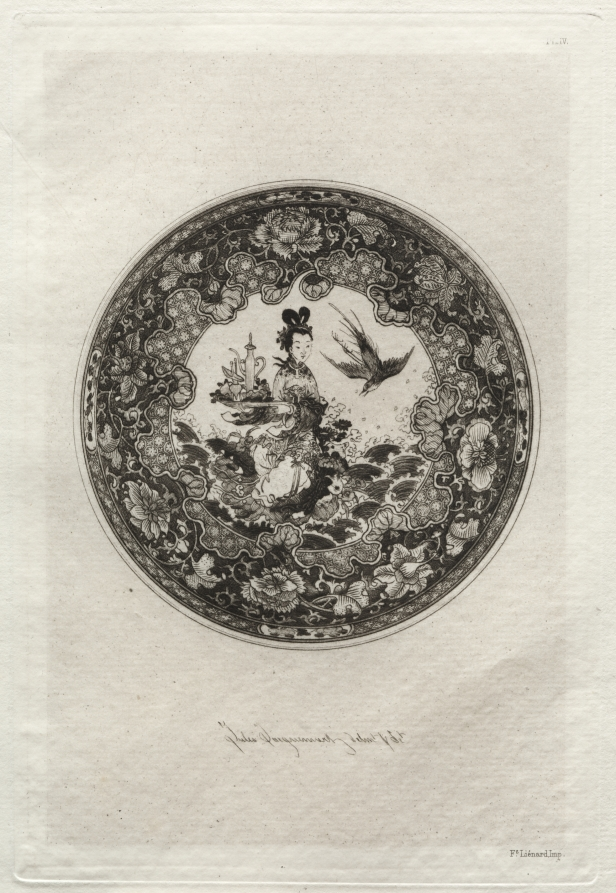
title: Saucer with Rich Enameled Ground and Medallion Representing the Goddess Kounin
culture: France, 19th century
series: History of the Ceramic Art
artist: Jules Jacquemart (French, 1837–1880)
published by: Ampson Low, Marston, Searle & Rivington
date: c. 1877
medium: etching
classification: Print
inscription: in plate, lower center: Jules Jacquemart